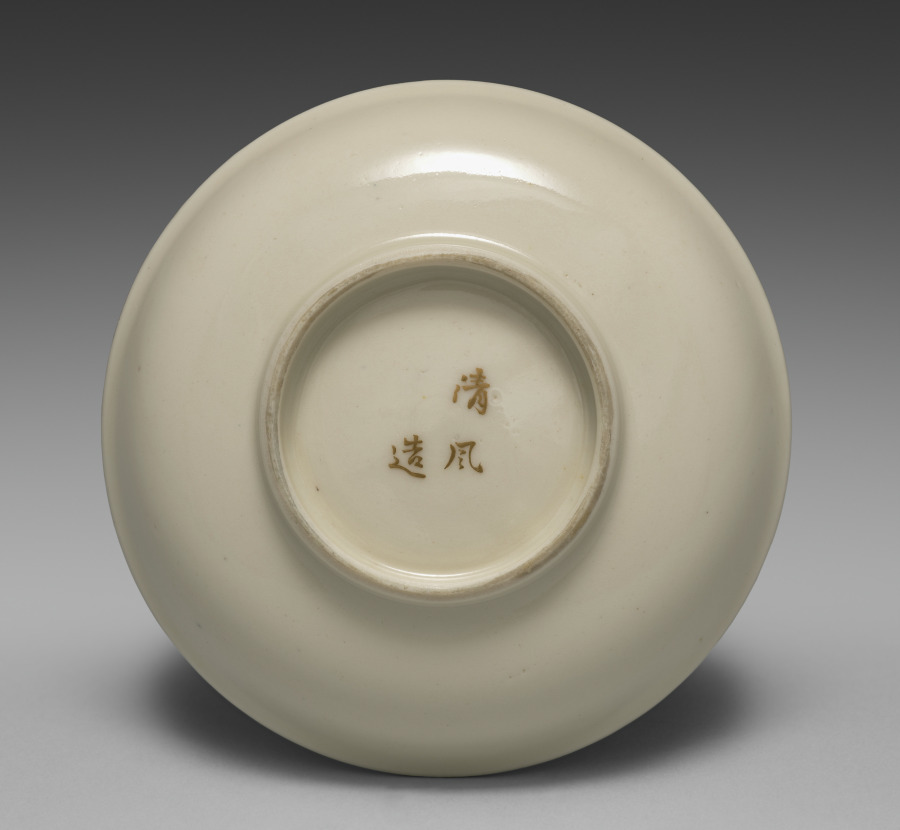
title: Small Dish from Dining Set with Plum Blossoms and Cracked-Ice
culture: Japan, Meiji period (1868–1912)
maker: Seifū Yohei II (Japanese, 1844–1878)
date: c. 1875–78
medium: Porcelain with molded designs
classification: Ceramic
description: Each item in this set has a delicate low-relief design of flowering plum branches over scattered, intersecting lines meant to resemble the cracked-ice surface of a frozen body of water and is signed on the base in gold pigment. While Yohei II produced many fine works in underglaze blue, like those produced by Kiyomizu Shichibei, he also made works in quite different styles later in his career, from the early 1870 s. In 1873, he was appointed purveyor to the Industrial Center of Kyoto Prefecture, a designation associated with Kyoto’s efforts to reach an international market through the port of Kobe; and from 1875 until his death, he was involved in national-level projects to present Japanese ceramics across the world. It was during this period that Yohei III was apprenticed to Yohei II, and it has been suggested that this set may in fact be an early example of Yohei III’s work, which he signed with his teacher’s name. Decorated with flowers resembling Japanese textile motifs, the set calls to mind the design of Yohei II’s pair of vases with plum blossoms in the Victoria and Albert Museum. Here, the elaborate trees created for a formal public exhibition setting have been translated into the approachable blossoms of the genteel domestic environment. While the designs are consistent across the pieces, each raised flower petal and pistil and each incised line in the ice was done by hand, so the cups, bowls, and dishes are similar yet unique. The bottoms of two boxes once identified the set’s owner, but the information has been deliberately obscured with black ink. However, inscriptions still visible appear to indicate two occasions, once at the end of July 1886 , and once again in June 1916 , when parts of the set were requested from Hokura in Niigata Prefecture. The location corresponds to a neighborhood in the present-day city of Jōetsu. The surname Tsuji 辻 also appears on a paper tag affixed to one of the box cloths. Future research may possibly reveal more about their provenance. A vase by Yohei III in a private collection combines the formal grandeur of the Yohei II vases in the Victoria and Albert Museum with the gentler design of this dining set, placing flowering plum trees against soft, scalloped-edge clouds resembling those in golden screens.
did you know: The dining wares have a creamy white coloration that the four boxes containing them identify as Korean in style.